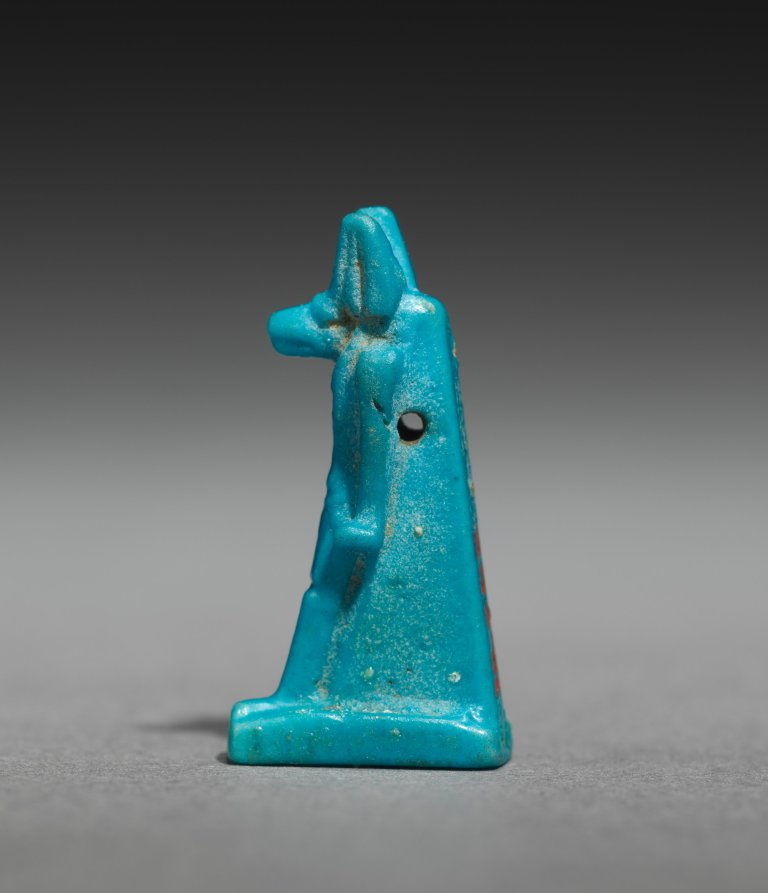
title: Amulet of Anubis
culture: Egypt, Late period (715–332 BCE), Dynasties 27–31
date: 525–332 BCE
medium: turquoise faience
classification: Amulets